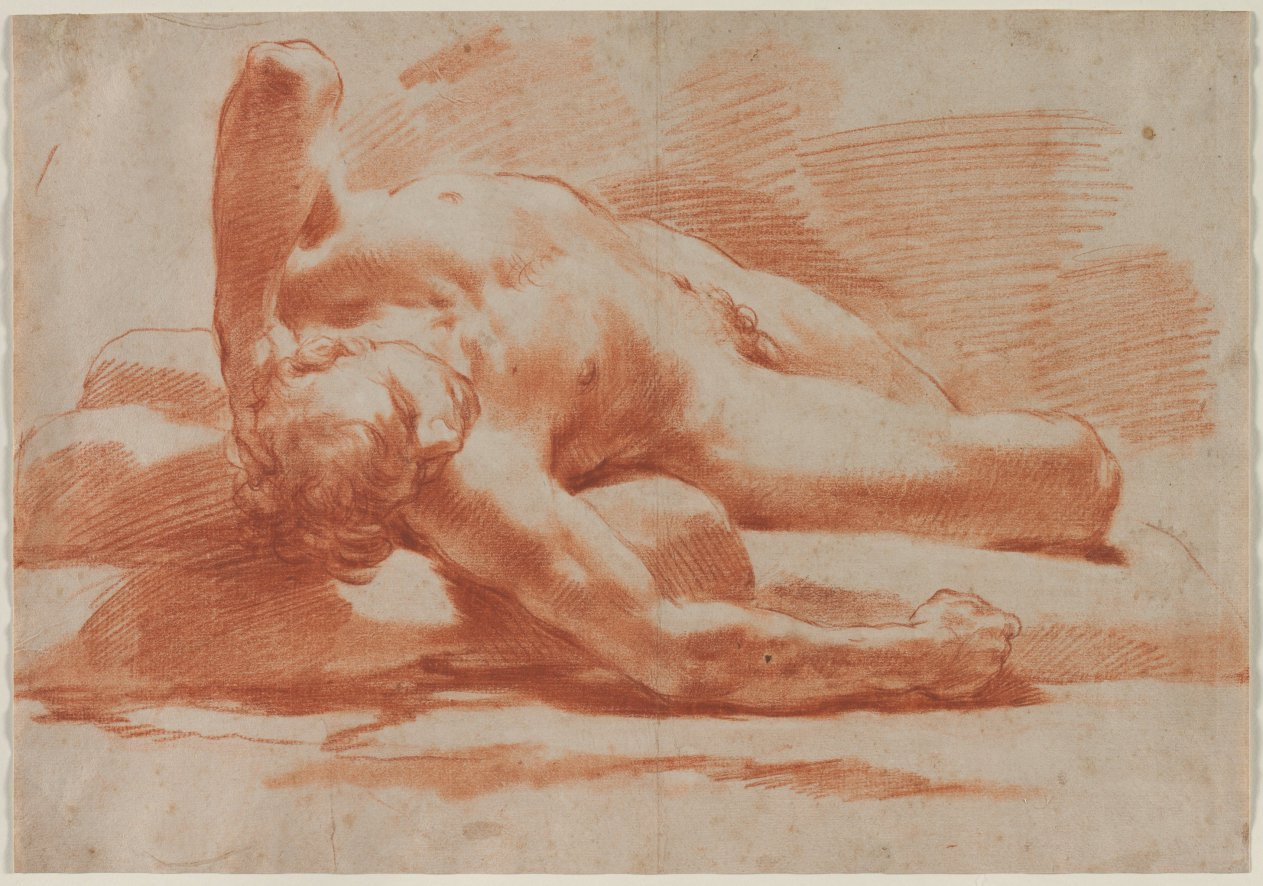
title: Reclining Male Nude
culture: Italy, 18th century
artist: Gaetano Gandolfi (Italian, 1734–1802)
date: second half 18th century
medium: red chalk (stumped)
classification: Drawing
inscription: VERSO, lower left, in graphite: [9?]77 [circled] / [illegible, cropped]